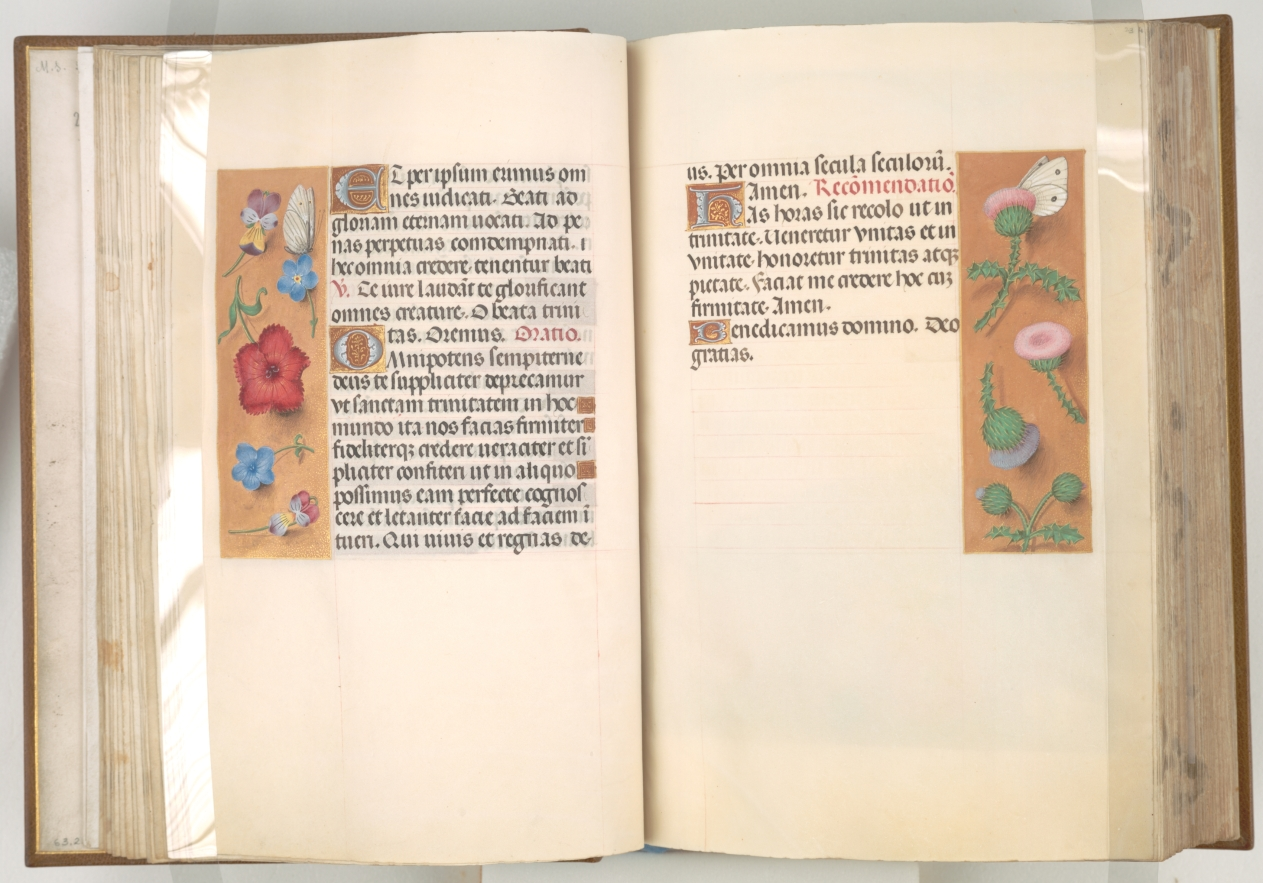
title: Hours of Queen Isabella the Catholic, Queen of Spain: Fol. 23r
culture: Flanders, Ghent and Bruges, late 15th century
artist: Master of the First Prayerbook of Maximillian (Flemish, c. 1444–1519)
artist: and Associates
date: c. 1500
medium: ink, tempera, and gold on vellum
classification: Bound Volume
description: This manuscript was illuminated by a circle of at least five highly organized manuscript painters active in the Flemish cities of Ghent and Bruges. The principal illuminator was Alexander Bening, who painted the majority of the book's miniatures. Manuscripts produced by this circle of artists are renowned for the decoration of their borders, which typically feature a rich variety of realistically-painted flowers, birds, and butterflies. This prayer book, called a book of hours, was intended not for a cleric, but for the private devotions of a lay person-in this case, Isabella the Catholic, Queen of Spain (1451-1504). Isabella's coat of arms embellishes the book's frontispiece. It is unlikely that the book was commissioned by the Queen herself; rather, she probably received it as a diplomatic gift from someone courting her patronage, perhaps Cardinal Francisco Jimenez de Cisneros. A Franciscan friar, Jimenez was dependent upon Isabella for his advancement, first to the post of Queen's confessor in 1492, and then to Archbishop of Toledo in 1495.